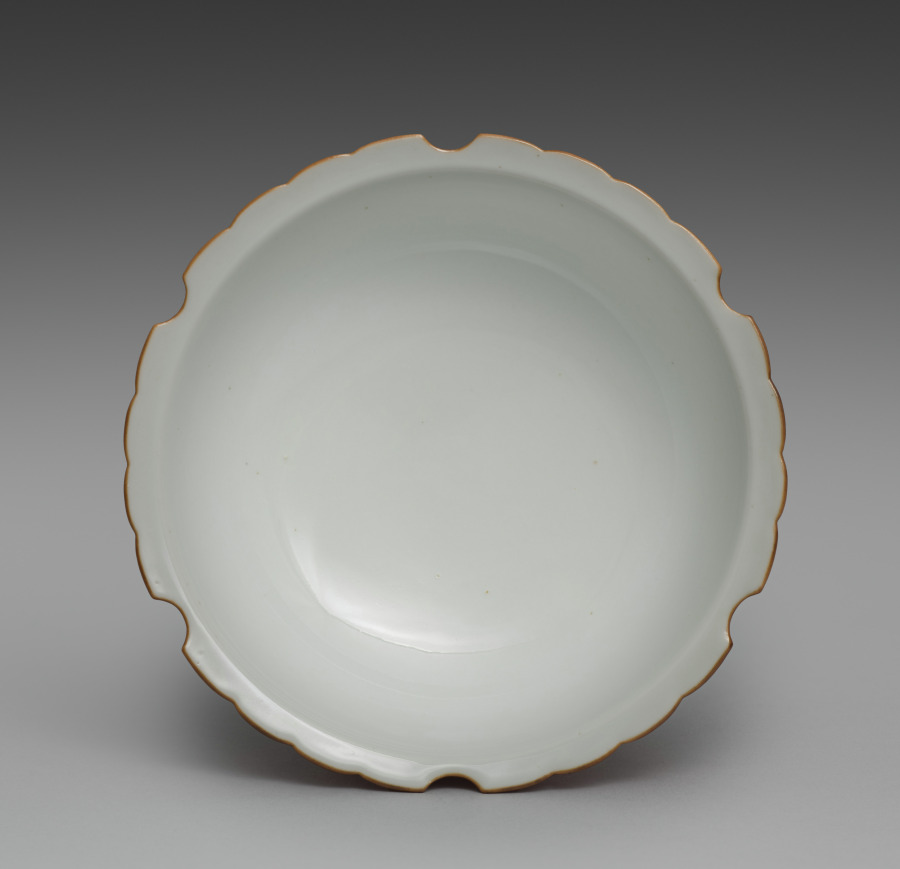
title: Dish from Snow-Flake Side Dishes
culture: Japan, Meiji period (1868–1912)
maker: Seifū Yohei III (Japanese, 1851–1914)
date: 1893–1914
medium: One from a set of six porcelain dishes; porcelain with lobed rims and pink glaze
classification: Ceramic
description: According to the box lid, this set of 6 side dishes, or mukōzuke, are “snow-flower style” (sekkashiki), having mouths shaped like snowflakes. Their mouths, which have 6 lobes and scalloped edges, are traced with brown iron oxide at the rim. The outside of each bowl is glazed with a very bright pink over the basin and foot, and the inside is left white. From directly above, one sees a snowflake-like shape, and from the side, they seem to float above a rosy ground.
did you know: The box for this set of dishes has an inscription on the side noting that they were for a person with the family name Nakamoto.